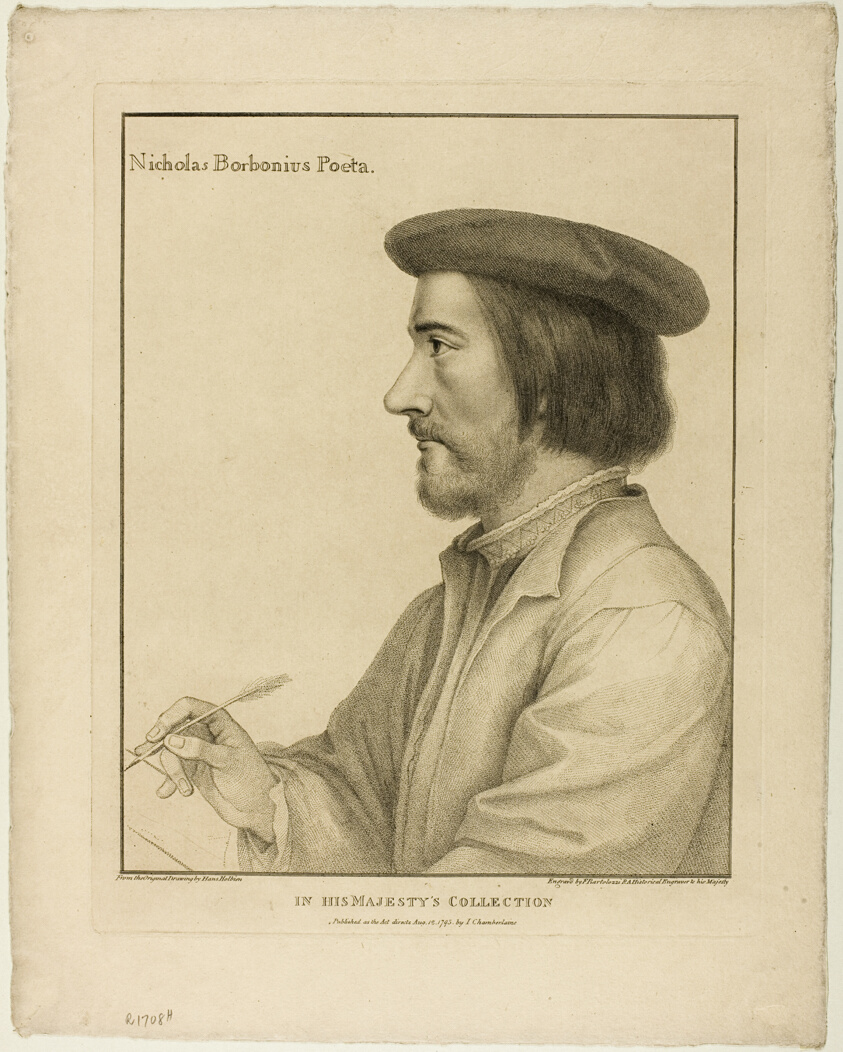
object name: Print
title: Nicholas Bourbon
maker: Francesco Bartolozzi (Italian, 1727-1815); after Hans Holbein the younger (German, 1497-1543)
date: August 12, 1795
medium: Stipple engraving on buff wove paper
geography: Italy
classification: engraving; print; prints and drawing